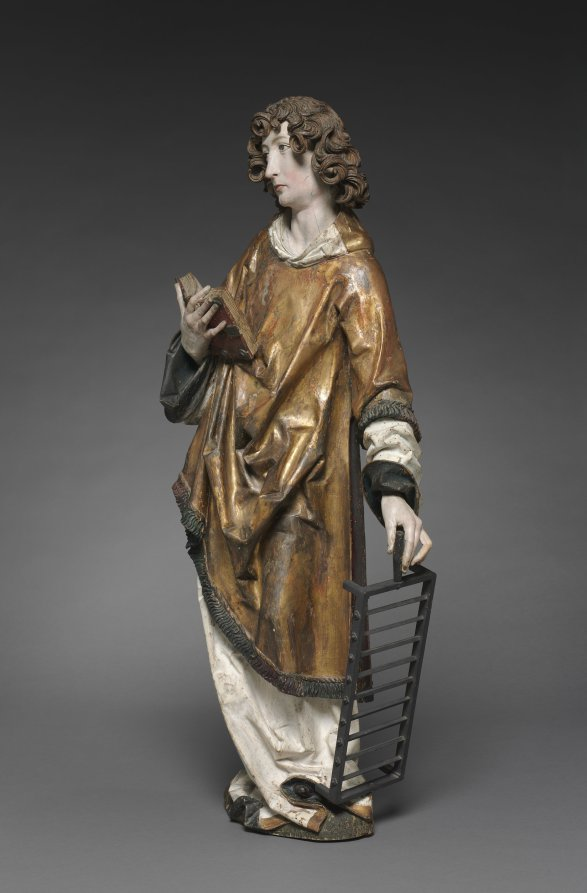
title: Saint Lawrence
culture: Germany, Würzburg, 16th century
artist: Tilman Riemenschneider (German, active Würzburg, c. 1460–1531)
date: 1502–8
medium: lindenwood with polychromy and gilding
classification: Sculpture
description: This sculpture, along with that of Saint Stephen (1959.43), and two female saints preserved in Frankfurt (Historisches Museum), are believed to be the remaining fragments of a large altarpiece carved by Riemenschneider for the Dominican convent in Rothenburg in Franconia (demolished in 1813). Saints Stephen and Lawrence both wear the dalmatic to indicate their status as deacons in the early church. Each holds a symbol of his martyrdom; here, Saint Lawrence holds a grill to indicate his death by burning. Late Gothic Style Art in Germany through the early 1500s remained firmly anchored in the late Gothic style with its associated interests in realism. Riemenschneider was one of the most prolific and versatile sculptors of this style, a recognized master in both stone and wood. His flourishing workshop employed as many as 40 apprentices in sculpting, woodcarving, and painting. His sculptures are noted for the dreamy, melancholy, and introspective quality in their expressions, as well as their remarkable attention to detail.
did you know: Before Riemenschneider finally settled in Würzburg, Germany, in 1484, he traveled to Strasbourg and Colmar, where he became acquainted with the works of the engraver Martin Schongauer.